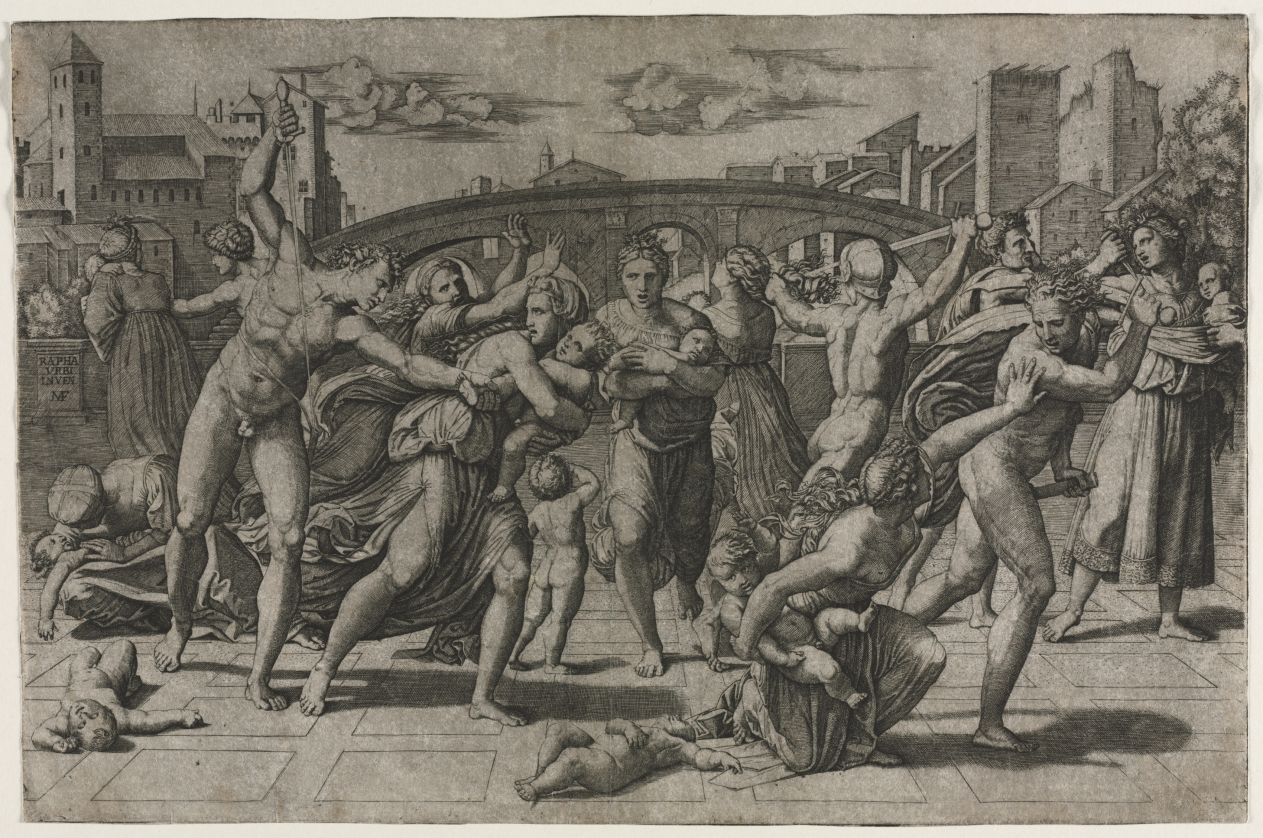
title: Massacre of the Innocents without the Fir Tree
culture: Italy, 16th century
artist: Marcantonio Raimondi (Italian, 1470/82–1527/34)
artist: after Raphael (Italian, 1483–1520)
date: ca. 1513–15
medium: engraving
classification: Print